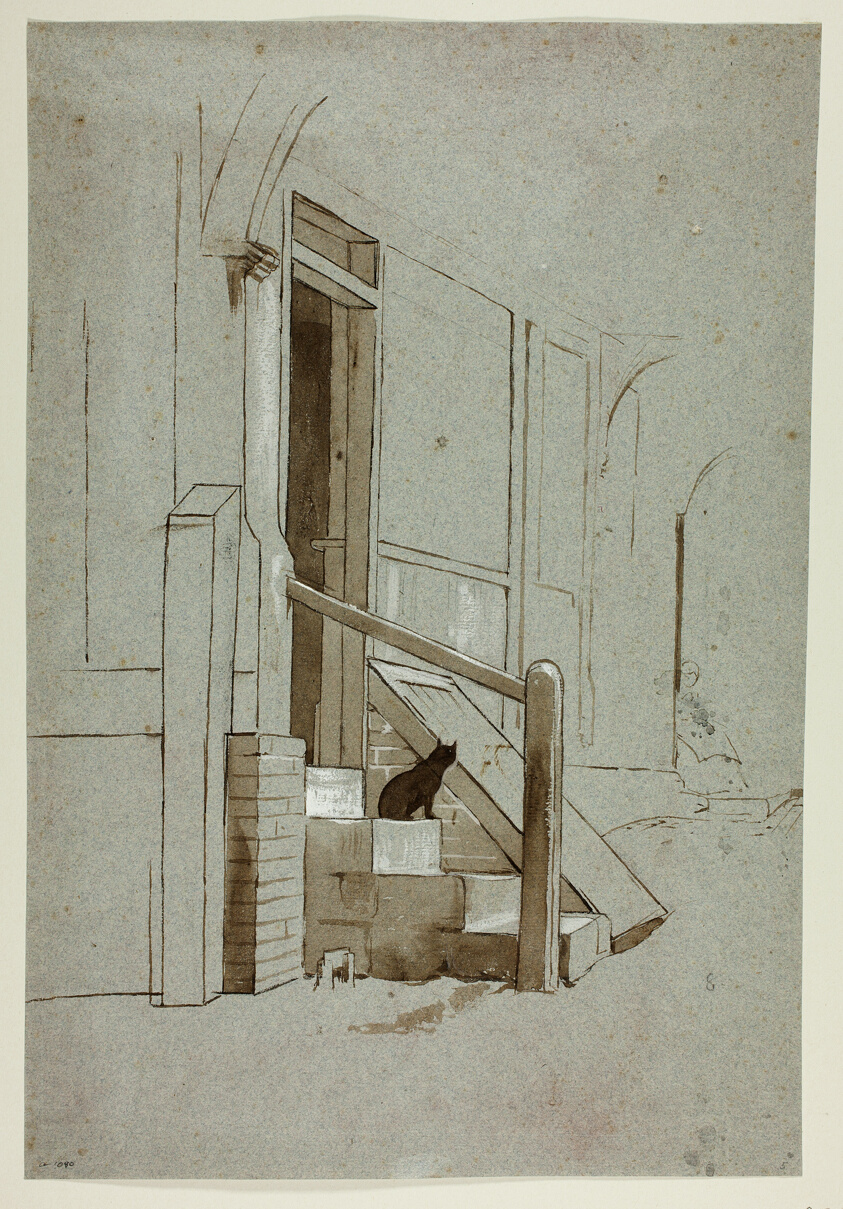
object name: Drawing and Watercolor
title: Cat on Doorstep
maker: Henry Stacy Marks (English, 1829-1898)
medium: Brush and brown wash, heightened with white gouache, over traces of graphite, on blue laid paper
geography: England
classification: ink or chalk wash; drawings (visual works); prints and drawing